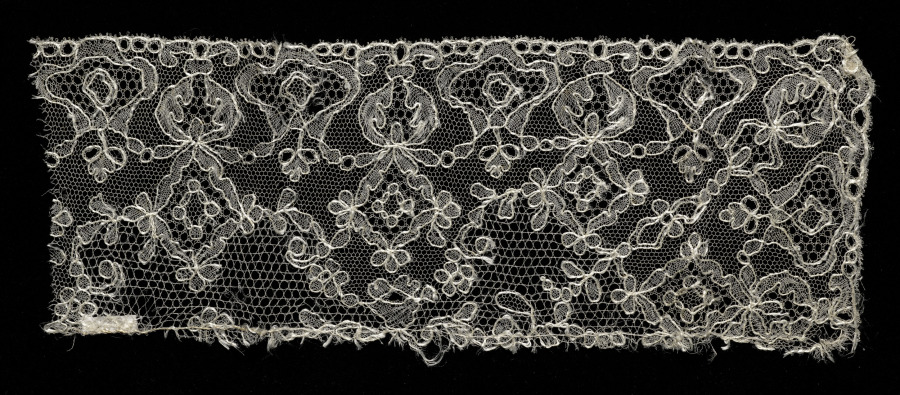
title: Lace Edging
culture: Spain, Seville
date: 1700s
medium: Bobbin lace (blonde lace)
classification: Lace